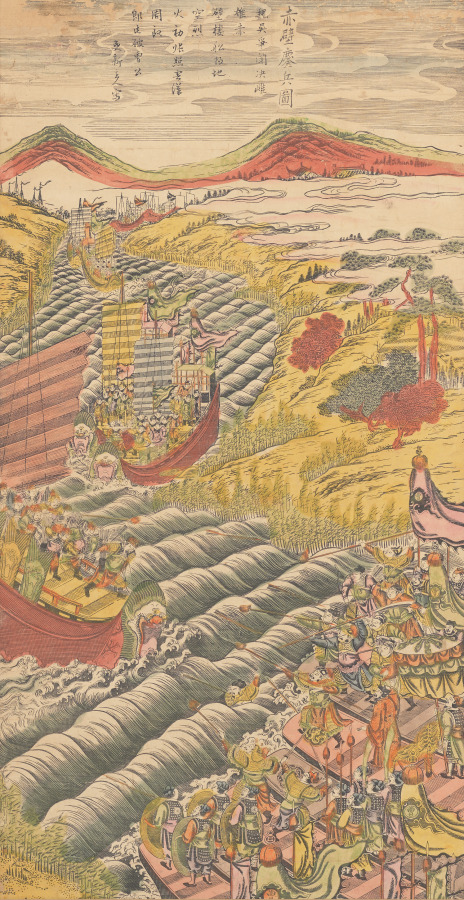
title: The Fierce Battle of Red Cliff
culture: China, Qing dynasty (1644–1911), Qianlong period (1736–95)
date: 1736–95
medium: Hanging scroll; polychrome woodblock print; ink and color on paper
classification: Print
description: In the 1600s, printing flourished in such Jiangnan cities as Nanjing, Suzhou, Hangzhou, and Huizhou, evolving from privately enjoyed illustrated books printed in color to more commercialized single-sheet color prints that were hung on walls and became part of the rich urban visual culture.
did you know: Woodblock printing in color reached a height in China in the 1600s to 1700s. The prints were executed by means of sets of separate blocks, each carved to print a different color.